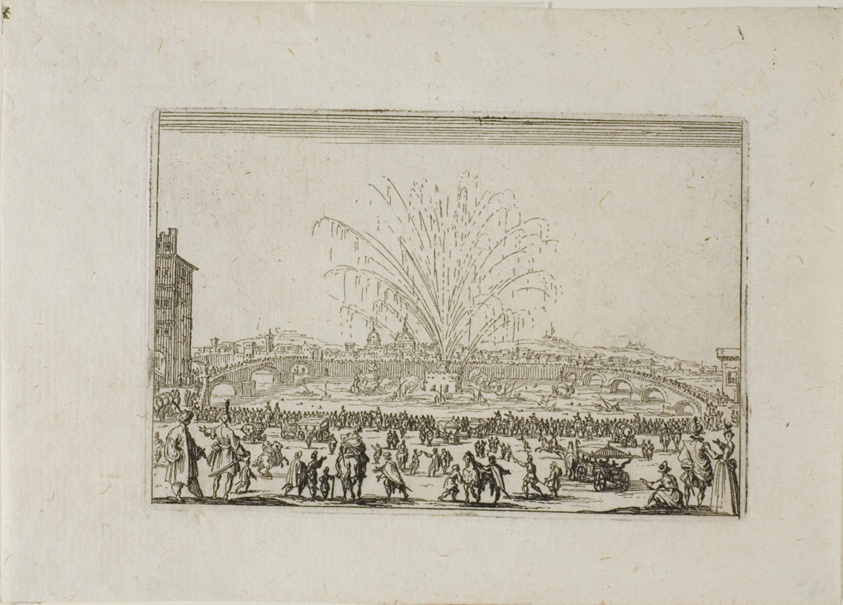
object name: Print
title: A Festival on the Arno, from The Caprices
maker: Jacques Callot (French, 1592-1635)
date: c. 1622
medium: Etching on ivory laid paper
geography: France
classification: etching; print; prints and drawing